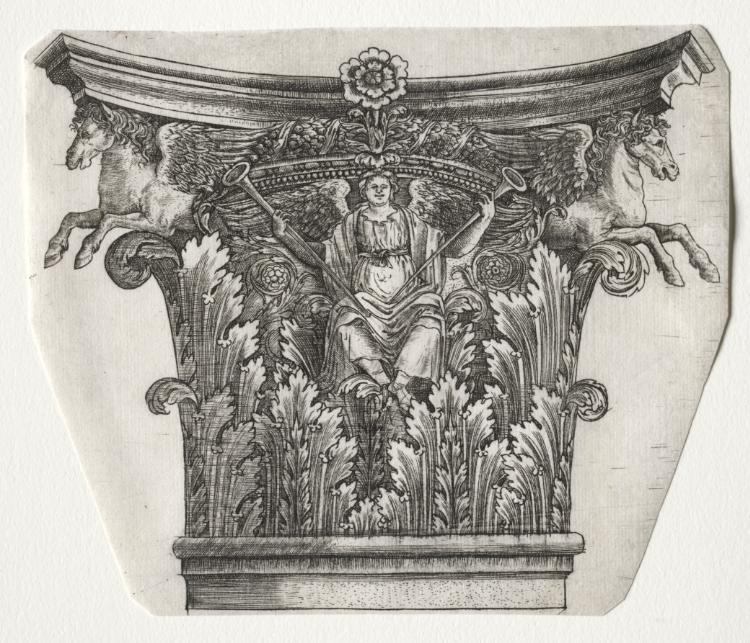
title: Base and Capital with Figure of Fame and Winged Horses (capital)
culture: Italy, 16th century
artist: Master G. A. with the man-trap (Italian, active 1525–50)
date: c. 1525–1550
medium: engraving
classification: Print